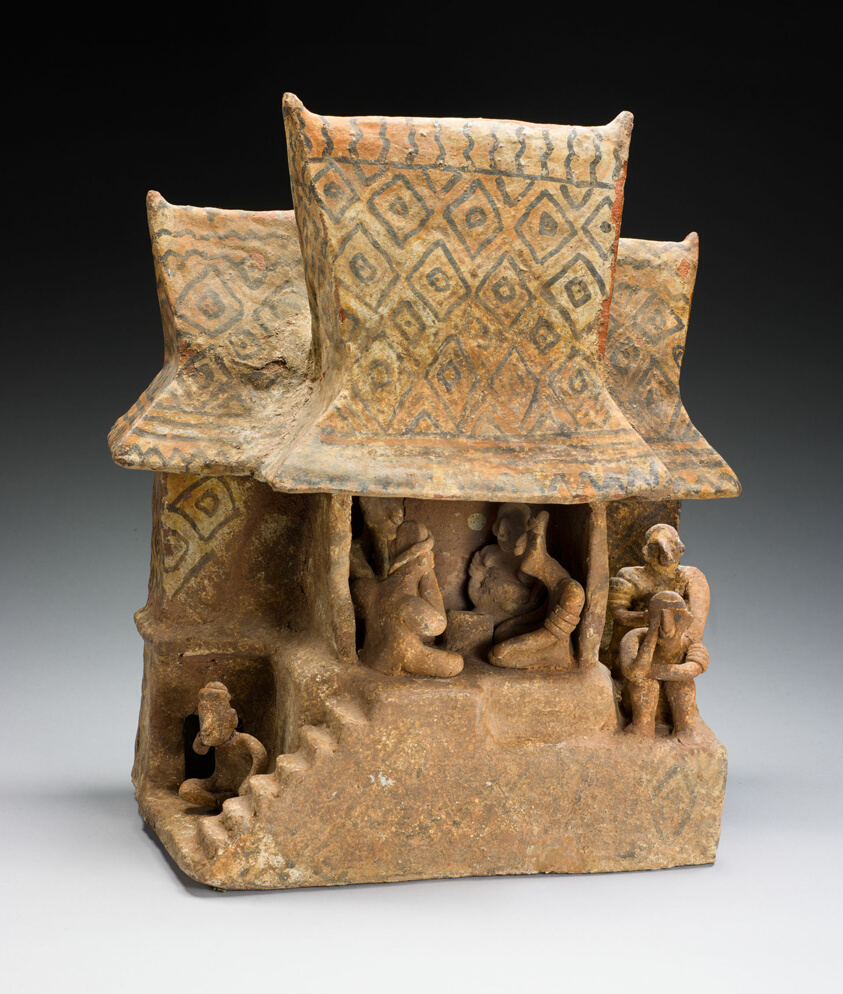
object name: Sculpture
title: House Model with Ritual Feast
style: nayarit, mesoamerican, Pre-Columbian, americas, west mexico, ixtlán del rio, Arts of the Americas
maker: Nayarit (Ixtlán del Río, Nayarit, Mexico)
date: 100 BCE–300 CE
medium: Ceramic and pigment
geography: Nayarit state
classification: earthenware; art of the americas; ceramics; sculpture; funerary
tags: architecture, funerary art, people, drinking, communities, temple, ritual, houses, feast